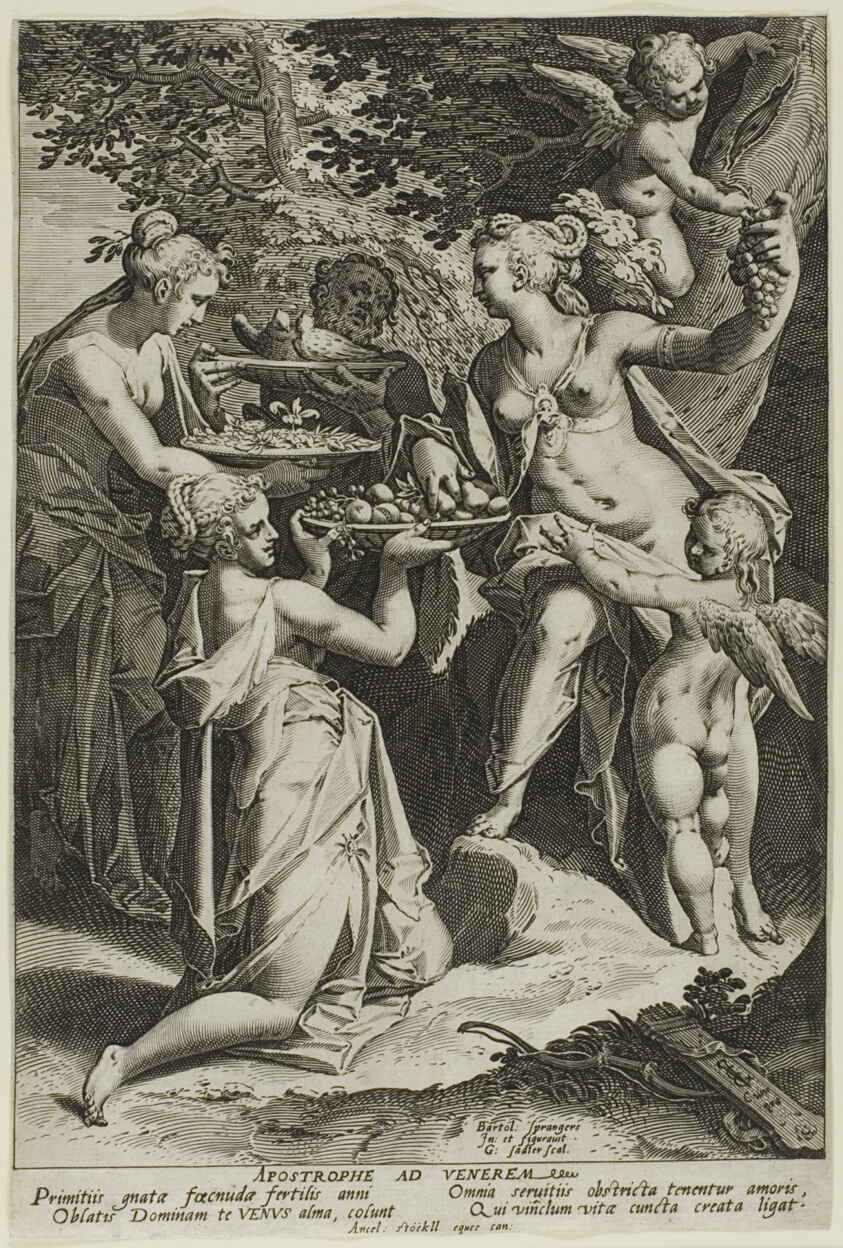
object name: Print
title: Venus Receiving Gifts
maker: Aegidius Sadeler (Flemish, 1570-1629); after Bartholomaeus Spranger (Flemish, 1546-1611)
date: c. 1588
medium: Engraving in black on ivory laid paper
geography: Flanders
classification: engraving; paper; print; prints and drawing